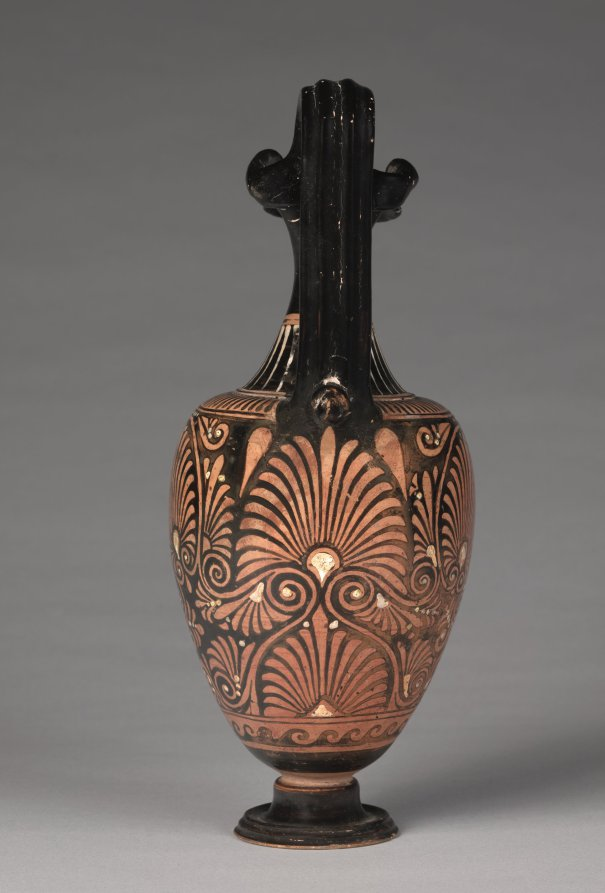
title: Red-Figure Oinochoe (Wine Jug): Eros and Woman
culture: South Italian, Apulian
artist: attributed to Cleveland Group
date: c. 340–320 BCE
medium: ceramic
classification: Ceramic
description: This wine jug provides the name for the Cleveland Group, comprising more than 20 similar vases decorated in the "Ornate" style of Apulian red-figure pottery. Close in style to the better known Darius Painter and the Patera and Ganymede Painters, many Cleveland Group vases feature very effeminate Eros figures like this one, here holding two phialai (libation bowls) and facing a woman before a harp.